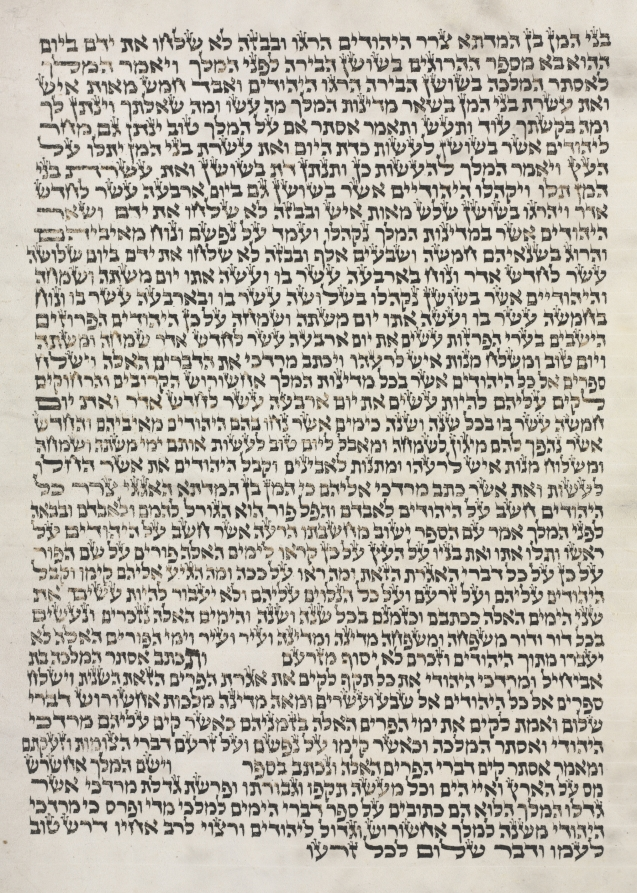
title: Scroll of Esther for the Purim Festival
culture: Europe (Eastern?), Hebrew, 19th century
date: c. 1850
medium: ink on vellum (eight columns, 39 lines of text on three membranes)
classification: Manuscript